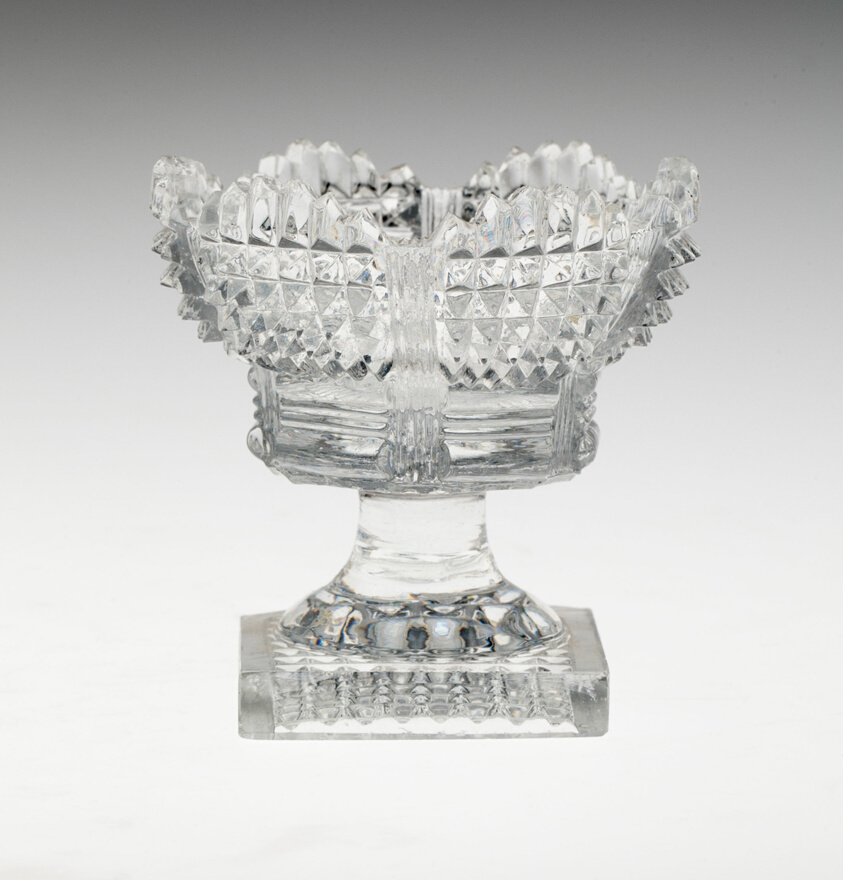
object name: Glass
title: Two Salts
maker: Baccarat Glassworks (French, founded 1764)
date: c. 1830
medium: Glass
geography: Lunéville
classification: glass; european decorative arts